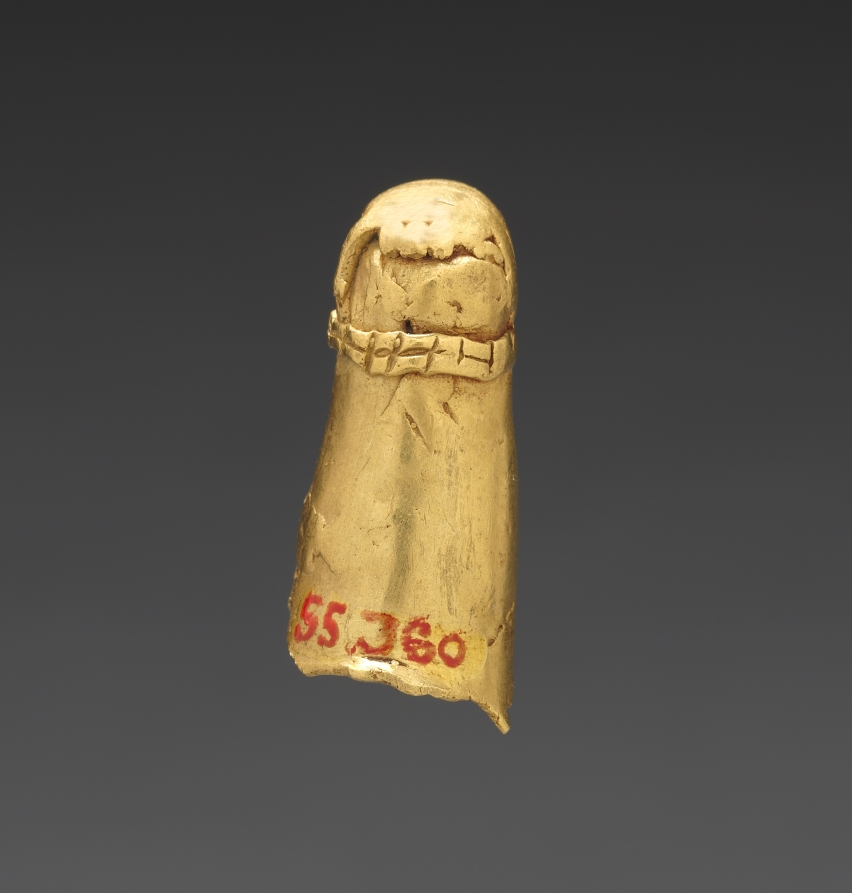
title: Fragment of an Animal Head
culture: Colombia, Quimbaya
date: 1–800 CE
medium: gold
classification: Metalwork